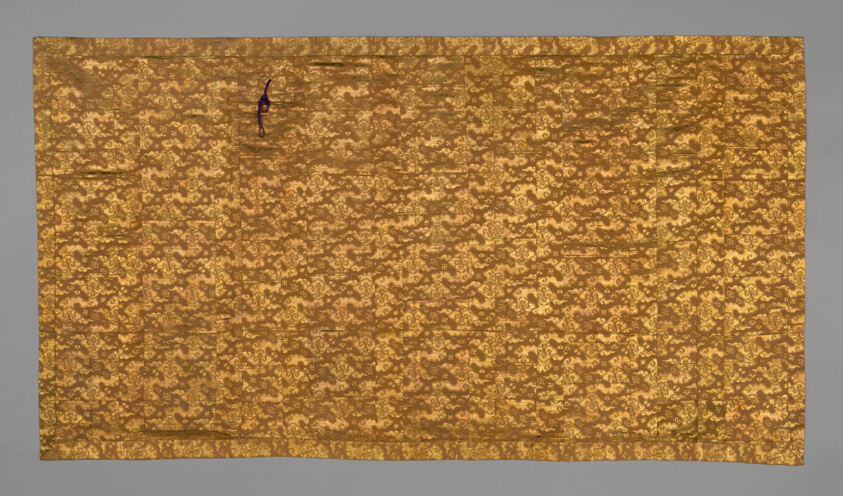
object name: Textile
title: Kesa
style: edo (japanese period)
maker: Japan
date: late Edo period (1789–1868), early 19th century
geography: Japan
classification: textile; costume; liturgical - buddhist; weaving